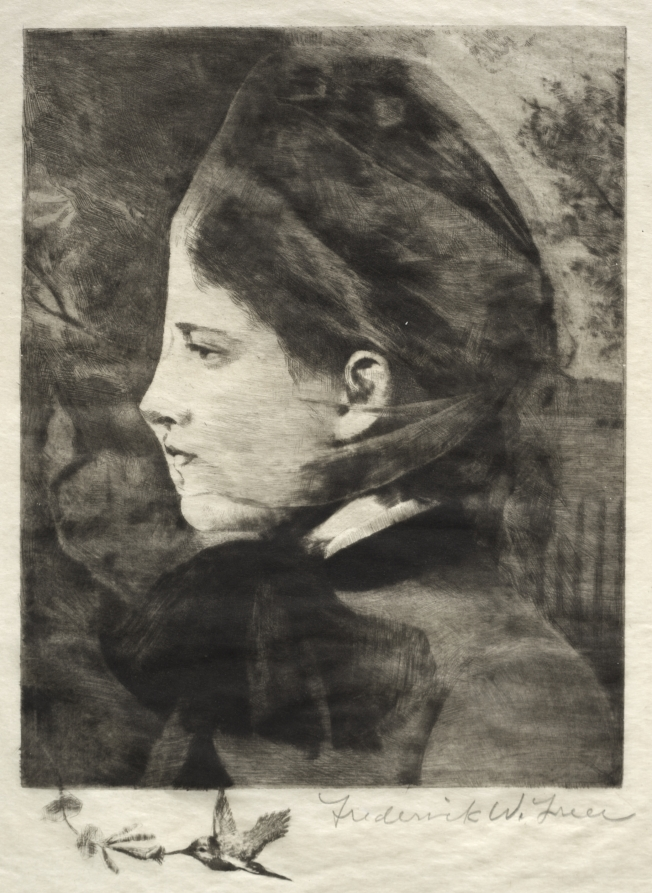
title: Head of a Woman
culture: America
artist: Frederick Warren Freer (American, 1849–1908)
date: 1880–1900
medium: etching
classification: Print